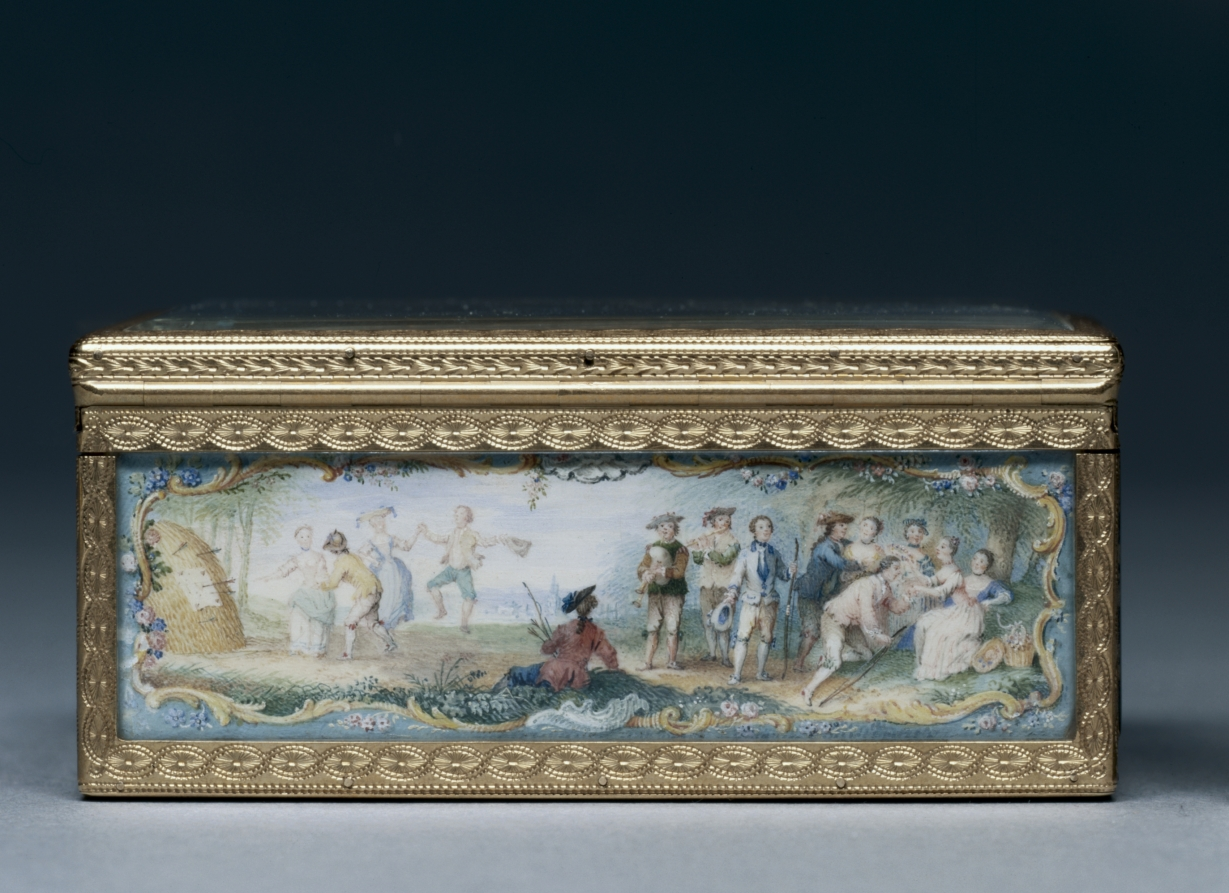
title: Snuff Box (Tabatière)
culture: France, 18th century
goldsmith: Jean Ducrollay (French, 1709–1787)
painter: Louis Nicolas van Blarenberghe (French, 1716–1794)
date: 1753–54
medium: gold and glass with miniatures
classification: Metalwork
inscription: [Maker's mark of Jean Ducrollay, master goldsmith in 1734, inside cover; bottom; right side]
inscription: [Charge mark of Julien Berthe, Paris, 1750-1756, inside cover; bottom; right side]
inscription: [Discharge mark of Julien Berthe, Paris, 1750-1756, on bezel]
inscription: [Inscribed on miniature, front side]: "V.[an] Blarenberghe/1753"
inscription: [Warden's mark for Paris, 1763-1754, inside cover; bottom; right side]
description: In 18th-century France ornately enameled boxes that held snuff—powdered tobacco—became a popular accessory in the French court. This object’s rectangular shape differs from early work attributed to Jean Ducrollay. Though the light colors, floral borders, and depictions of lively outdoor recreation are representative of earlier rococo imagery, the rectangular shape and simple frieze make it a primary example of rising neoclassicism.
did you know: The Ducrollay family was one of the most sought-after Parisian goldsmith workshops under the reign of French King Louis XV.